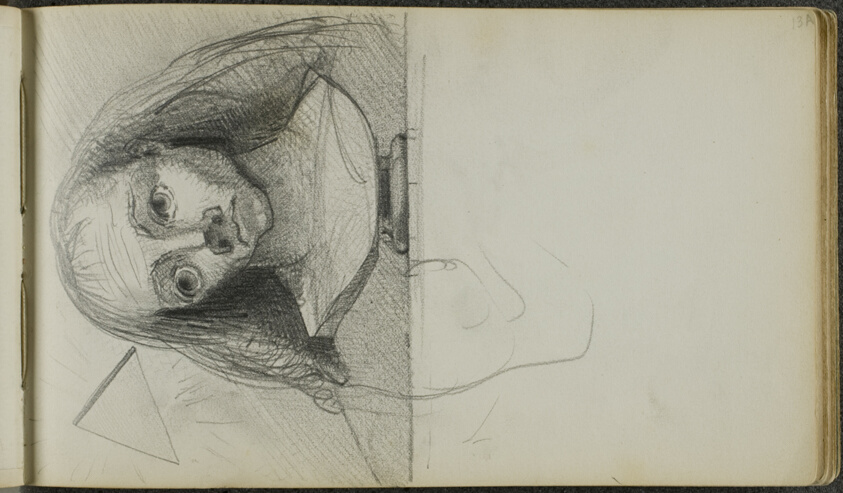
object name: Book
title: Sketchbook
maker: Odilon Redon (French, 1840-1916)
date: c. 1879–85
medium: 55-page sketch book of drawings in pencil on cream wove (with a few buff and blue) paper, with (simulated) laid paper interleaves, bound in black cardboard with black fabric taping on spine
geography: France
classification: sketchbook; graphite; prints and drawing; book; paper